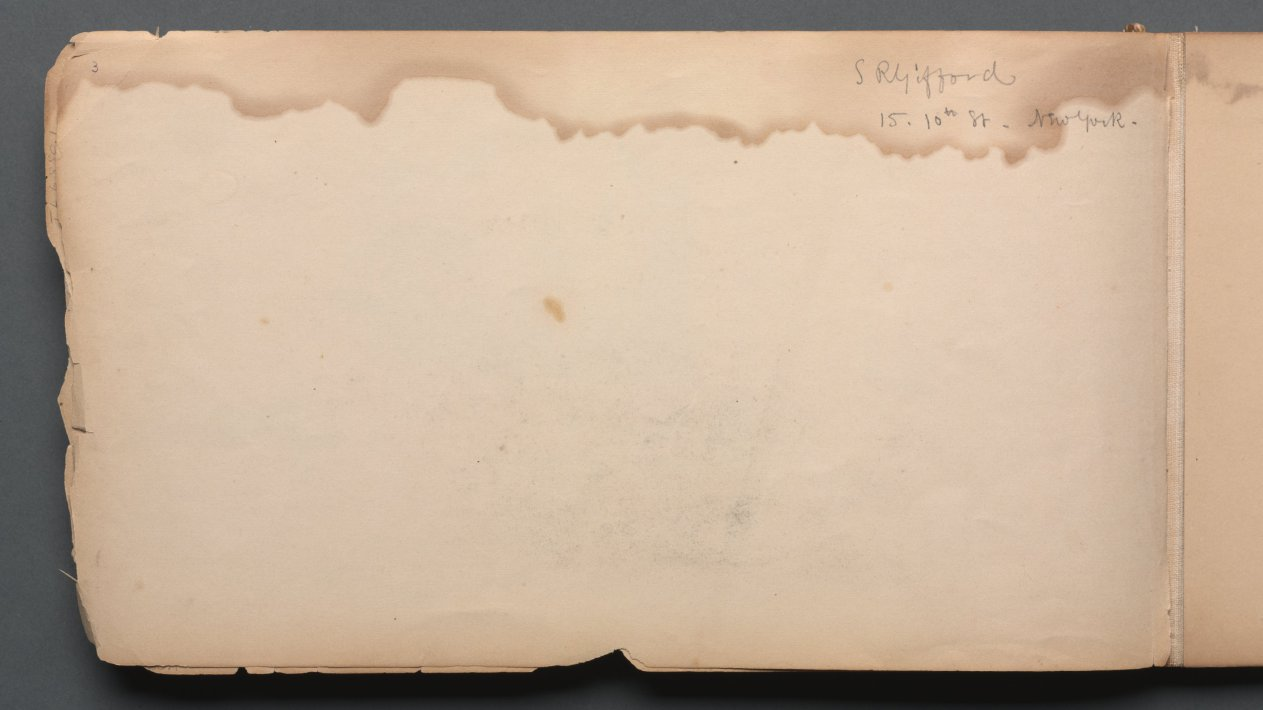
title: Sketchbook, page 03: " S.R. Gifford 15 10th Street New York"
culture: America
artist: Sanford Robinson Gifford (American, 1823–1880)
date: 1859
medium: graphite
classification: Bound Volume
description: Gifford was an American landscape painter belonging to the second generation of Hudson River school artists. Based in New York City with a studio at the Tenth Street Studio Building, Gifford took annual summer trips to the Catskills, the Adirondacks, and other scenic locations in New England. This sketchbook accompanied the artist on his expedition in 1859 to New Hampshire and Maine, where he drew sites such as Dixville Notch, the White Mountains, and Peaks Island, Casco Bay. Gifford used such graphite studies as the basis for oil paintings worked up in his studio, such as A Home in the Wilderness (1866).